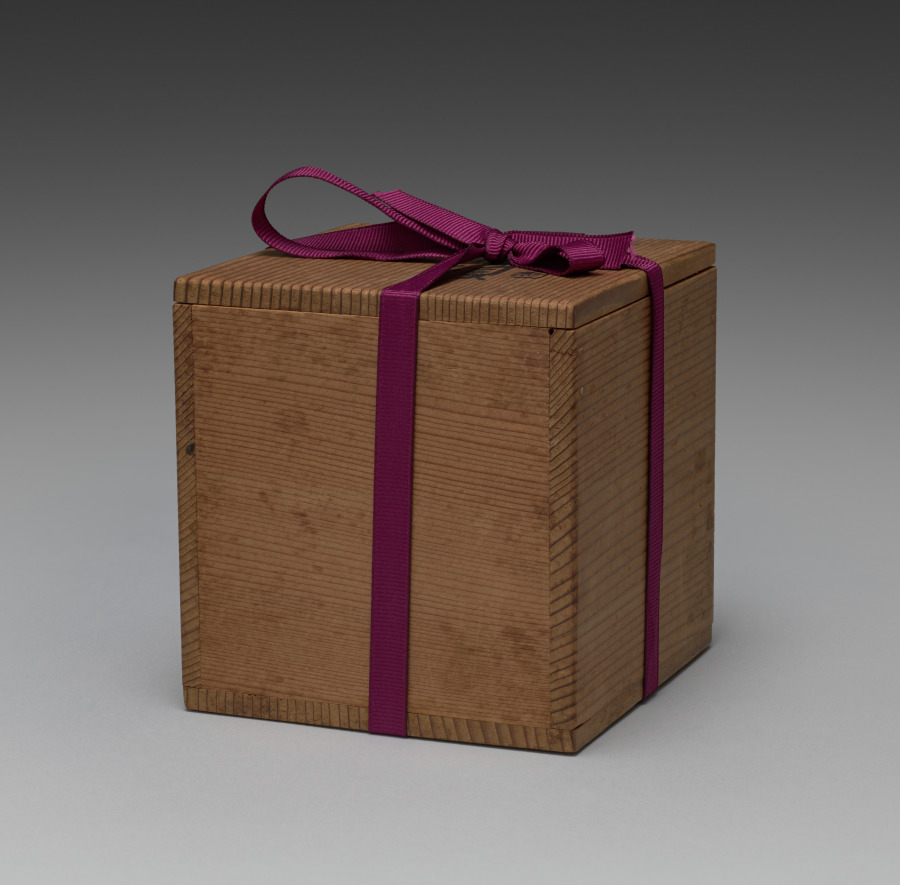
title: Teapot with Cherry Blossoms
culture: Japan, Taishō period (1912–26) or Shōwa period (1926–89)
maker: Seifū Yohei IV (Japanese, 1872–1951)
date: 1914–46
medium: Porcelain with underglaze blue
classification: Ceramic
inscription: 清風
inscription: 清風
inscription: 清風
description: This teapot with mountain cherry blossom motifs has its design in underglaze cobalt blue. It runs over both the pear-shaped body and the recessed lid, with its pointed, jewel-shaped handle. There is a faint bluish-green tint to the glaze. The mark impressed into the base of this work appears to be one used by Yohei III. However, the box inscription is brushed in a hand matching that of Yohei IV, and while the seal on the lid is one often used by Yohei III, that next to the signature on the back of the lid is one generally used by Yohei IV. The signature, too, resembles others belonging to Yohei IV. As the design, technique, and object named on the box accurately describe the contents, it seems unlikely, but not impossible, that it is mismatched. There are many cases in which Yohei III works are contained in boxes with inscriptions, seals, and a signature by Yohei IV. However, in such examples, Yohei IV clearly identifies himself as authenticating the work of his father and often includes his father’s Imperial Household Artist seal. This may be an example of a transitional piece in which Yohei IV has used his father’s mark on the base of his own work.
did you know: Cherry blossoms mark the arrival of spring, and their short-lived beauty is deeply anticipated and appreciated.